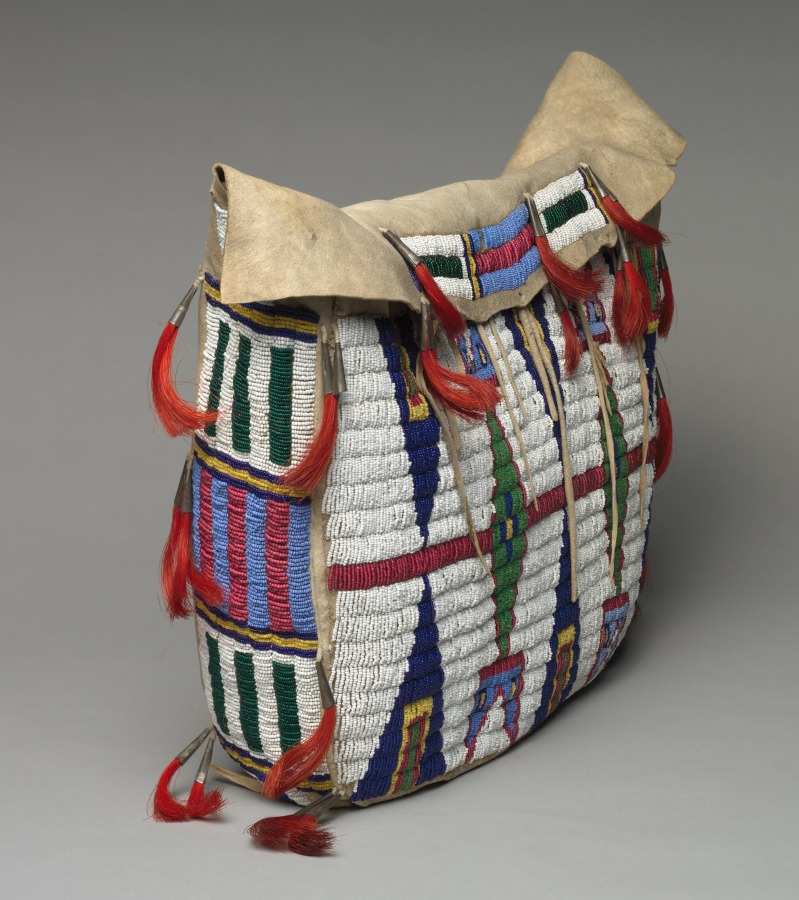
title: Storage Bag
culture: Native North America, Plains, Lakota (Sioux)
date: late 1800s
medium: Native-tanned hide, glass beads, dyed horsehair, tin cones, sinew thread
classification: Leather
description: Rectangular bags made of soft hide—known among early white traders as “possible bags” because they could hold “anything possible”—were used to store personal items inside the tipi, where they doubled as pillows. When encampments moved, the bags were carried on the side of a saddle, where their decoration could be admired.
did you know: Bags like this were used to store personal items inside the tipi, where they doubled as pillows.